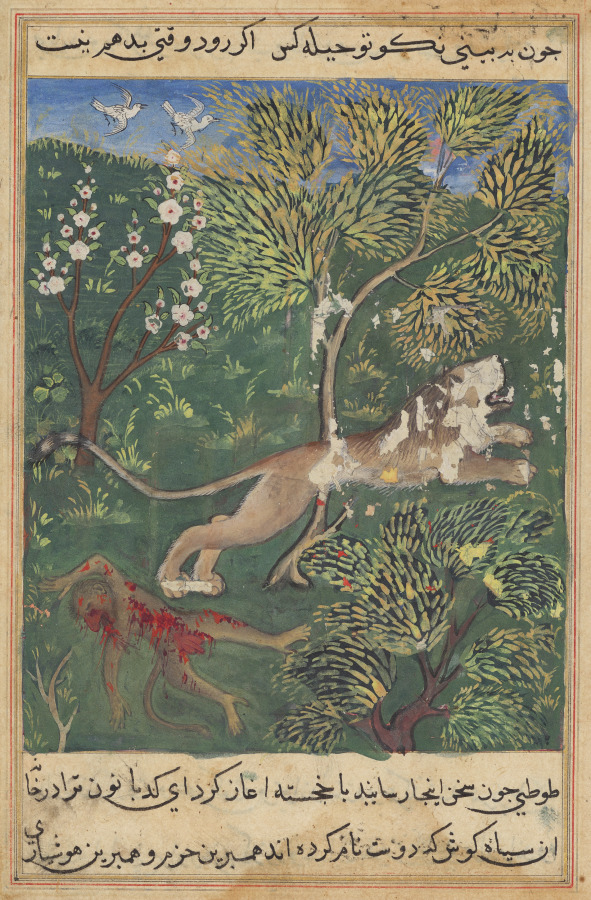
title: The lion, suspecting treachery on the part of the monkey, slays him and flees, from a Tuti-nama (Tales of a Parrot): Twenty-ninth Night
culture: Mughal India, court of Akbar (reigned 1556–1605)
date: c. 1560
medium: gum tempera, ink, and gold on paper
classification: Painting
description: The monkey, who once served as the lion’s chamberlain, lies mauled and dead in the meadow. The lion, who was once a formidable ruler, has become convinced that that the monkey betrayed him. In reality, the lion fell for a trick laid by a family of clever lynx who invaded his den.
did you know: A male torso, visible under the chipped paint, indicates this page was intended for another picture.